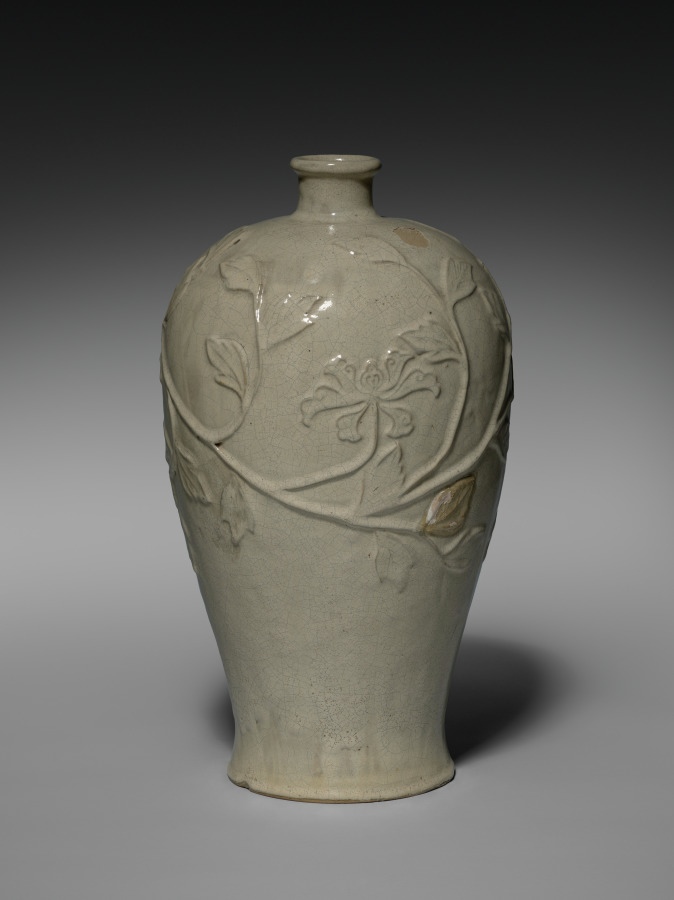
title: Jar: Kuang Tung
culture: China, Qing dynasty (1644-1911)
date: 1644–1911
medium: porcelain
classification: Ceramic